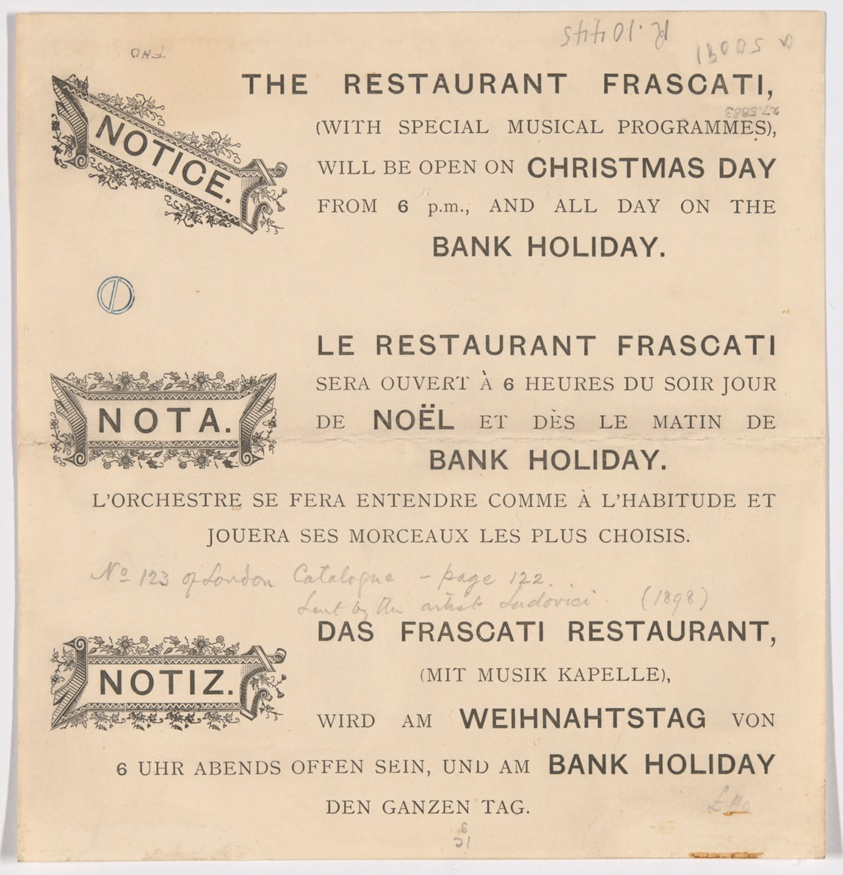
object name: Drawing and Watercolor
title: Sketch of the Peacock Room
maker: James McNeill Whistler (American, 1834-1903)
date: 1898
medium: Graphite (recto) on cream wove paper with printed text in black ink (verso)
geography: United States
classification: graphite; drawings (visual works); prints and drawing; paper